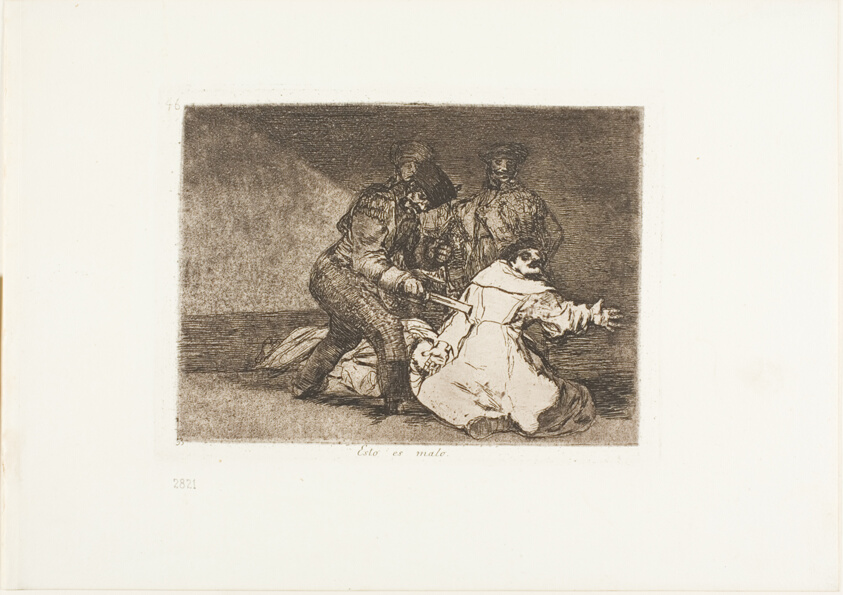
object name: Print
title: This is Bad, plate 46 from The Disasters of War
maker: Francisco José de Goya y Lucientes (Spanish, 1746-1828)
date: 1812/15, published 1863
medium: Etching, burnished aquatint, lavis, drypoint, and burin on ivory wove paper with gilt edges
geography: Spain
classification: etching; print; prints and drawing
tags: war